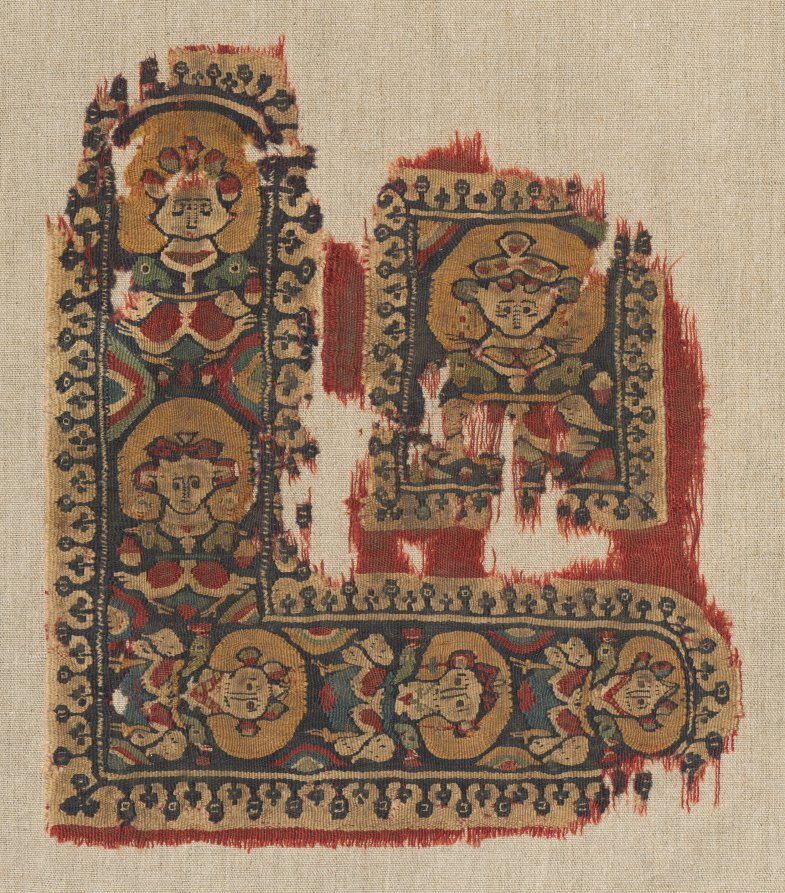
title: Ornament (Gammadion and Segmentum) from a Tunic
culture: Egypt, Antinoë ?, Byzantine period, 6th century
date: 500s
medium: tabby ground, inwoven tapestry ornament; wool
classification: Textile